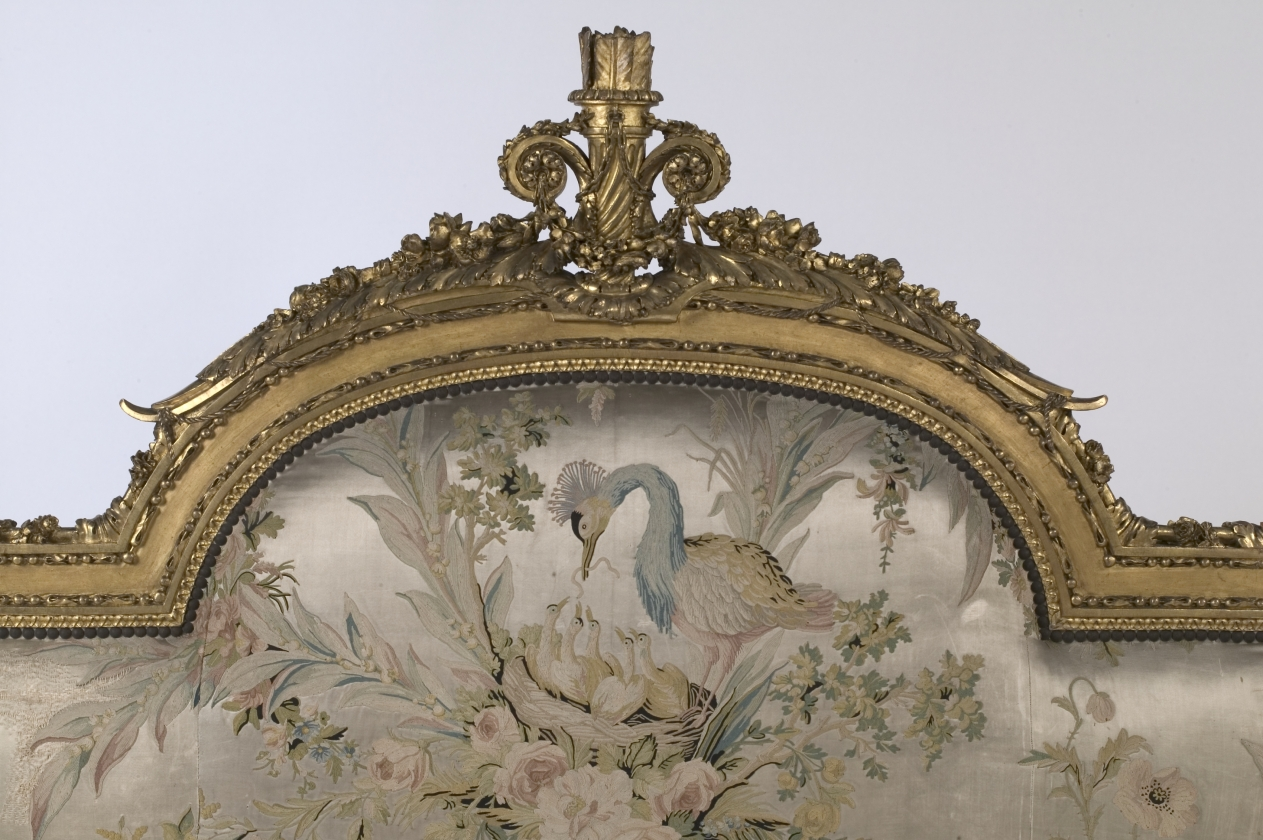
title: Bed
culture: France, 18th century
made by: attributed to Georges Jacob (French, 1739–1814)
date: 1700s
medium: gilded wood and embroidered satin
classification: Furniture and woodwork